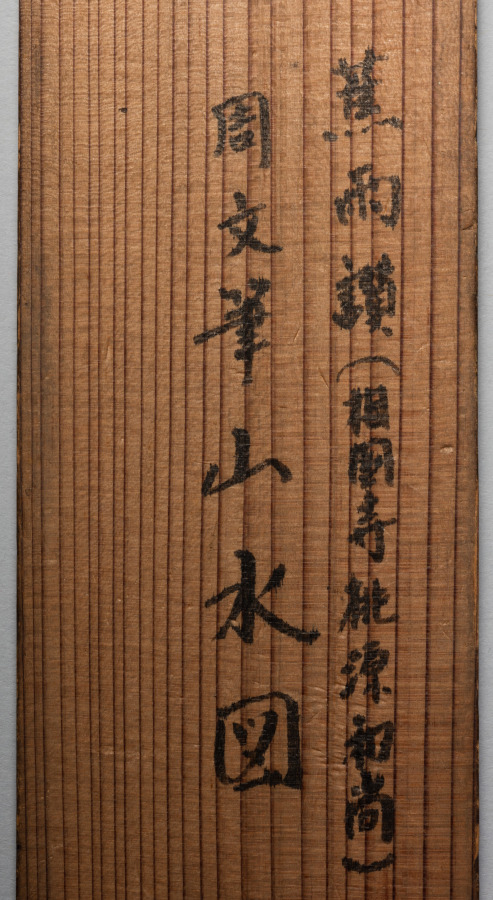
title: Landscape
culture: Japan, Muromachi period (1392–1573)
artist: attributed to Kenkō Shōkei (Japanese, active 1478–1506)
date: late 1400s–early 1500s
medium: hanging scroll, ink and light color on paper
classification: Painting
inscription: inscription above signed Shō'u Kojin; calligraphy by the Shokōji priest Tōgan Zuisen 桃源瑞仙 (1430–89)